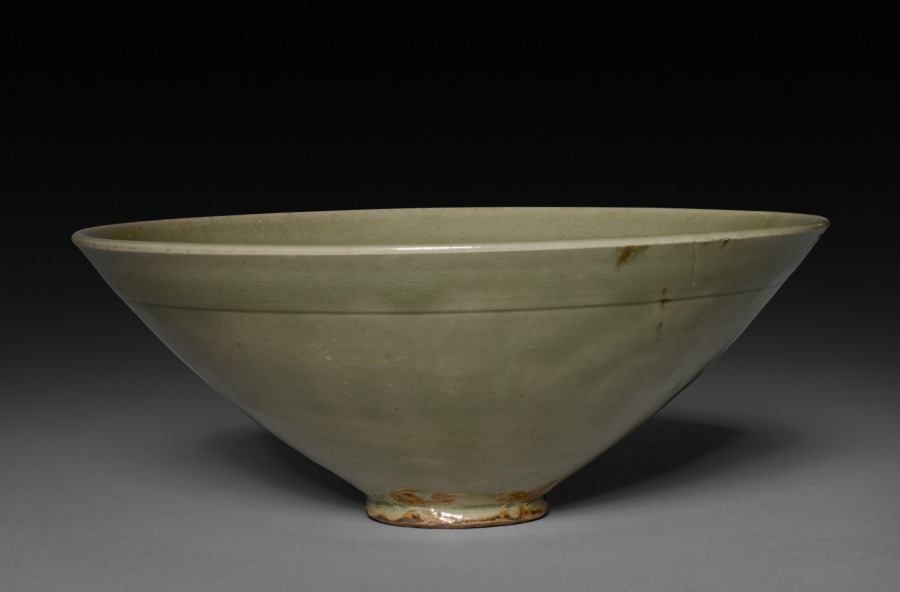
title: Bowl: Northern Celadon Ware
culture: China, Shaanxi or Henan province, Northern Song dynasty (960-1127)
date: 12th Century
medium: glazed stoneware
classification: Ceramic